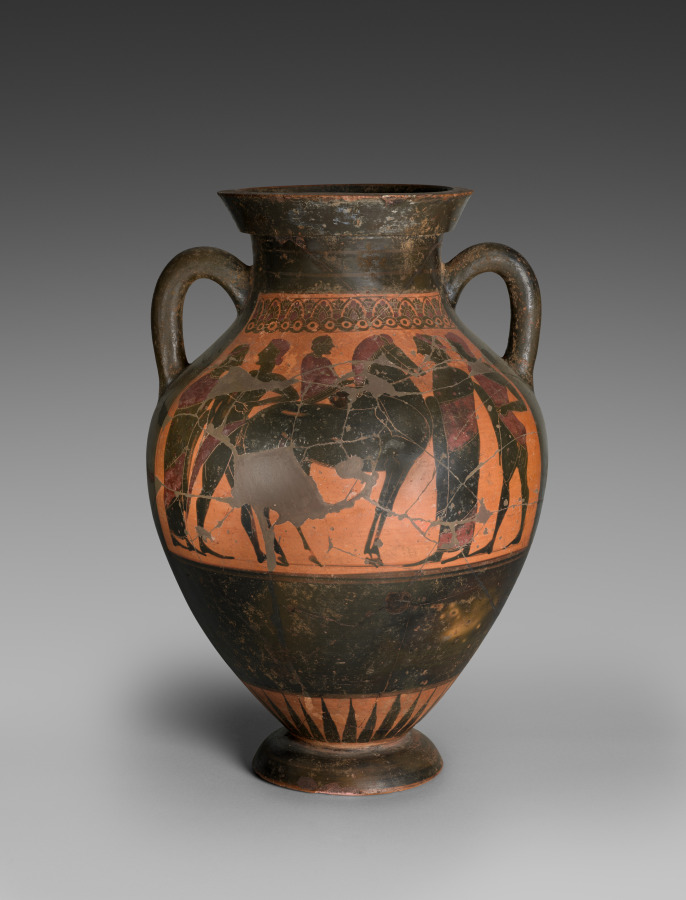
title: Black-Figure Amphora (Type B; Storage Vessel): Men and Horses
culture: Greek, Attic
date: c. 540 BCE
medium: ceramic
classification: Ceramic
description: Although pieced together from many fragments (with some still missing), this sizeable amphora remains impressive. On each side, a horsemen and four figures are contained within a large, reserved panel beneath a lotus-palmette frieze. The scenes, which differ slightly from one another in various details, cannot be identified with known historical or mythological figures or episodes.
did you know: The two sides of this amphora are very similar—a horseman flanked by pairs.